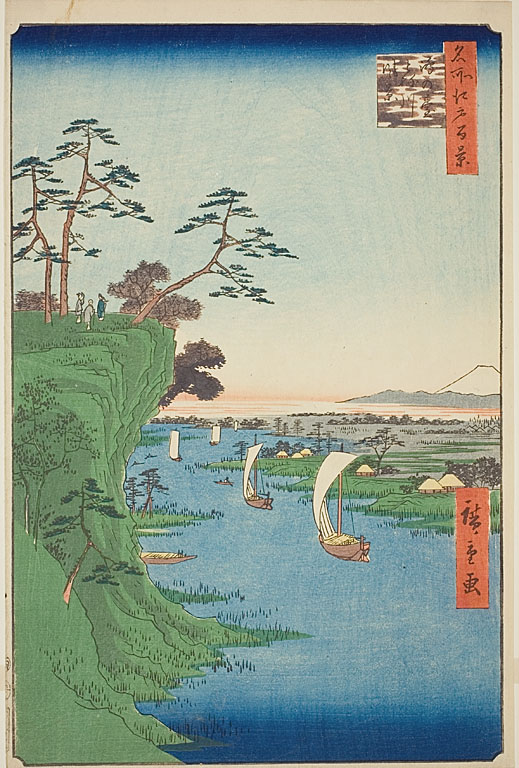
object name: Print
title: View of Konodai and the Tone River (Konodai Tonegawa fukei), No.95 from the series "One Hundred Famous Views of Edo (Meisho Edo hyakkei)"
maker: Utagawa Hiroshige (Japanese, 1797-1858)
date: 1856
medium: Color woodblock print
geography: Japan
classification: woodblock print; print; asian art